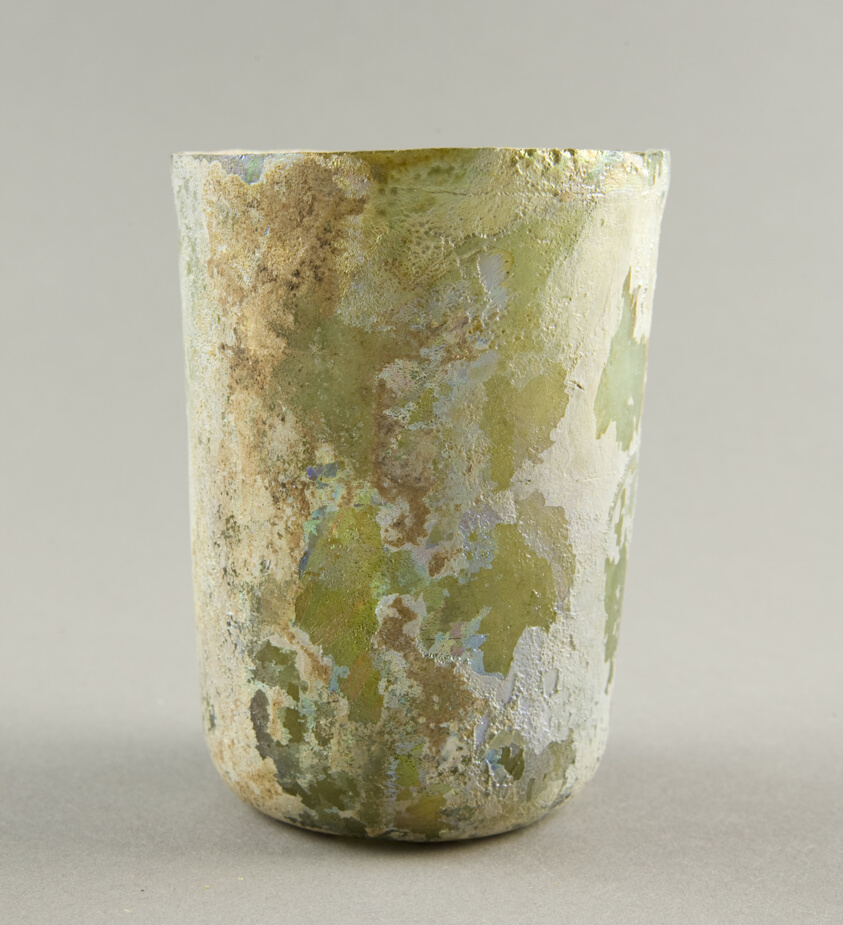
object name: Vessel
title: Beaker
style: syrian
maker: Roman, Levant or Syria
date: 1st-3rd century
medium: Glass, blown technique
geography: Syria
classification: drinking vessel; glass; vessel; ancient art